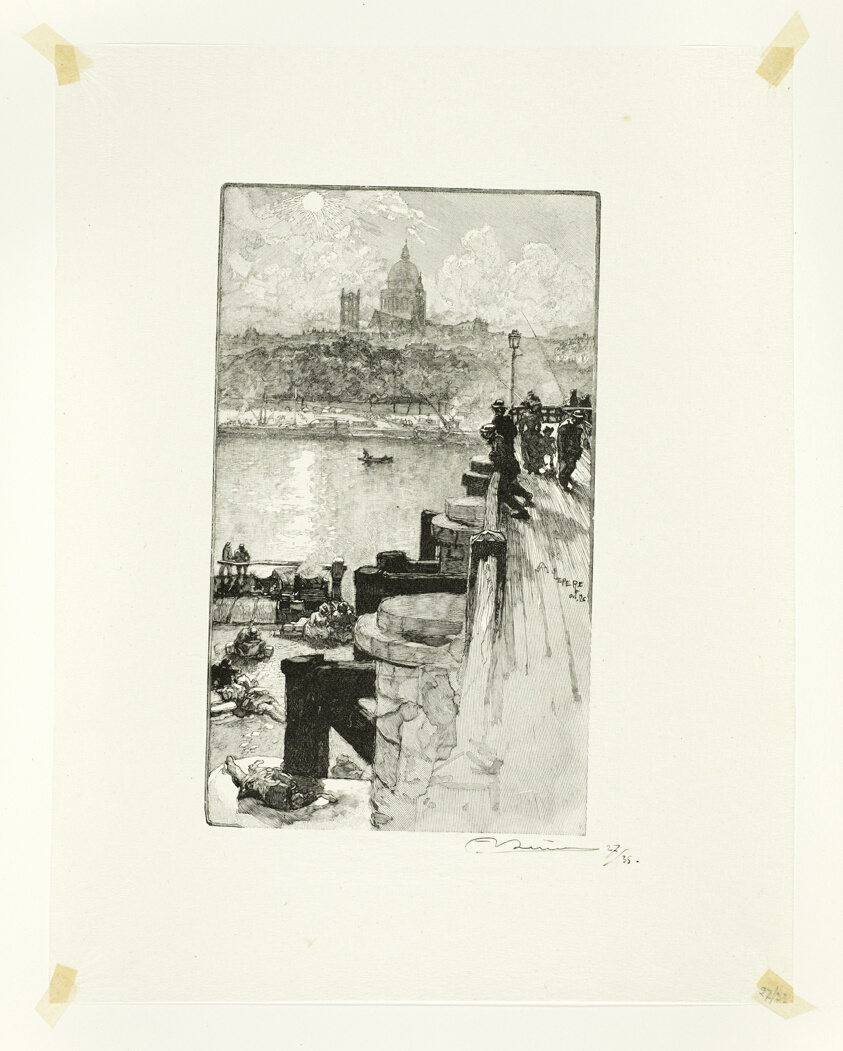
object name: Print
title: La Montagne Sainte-Geneviève, rue de l'Estacade, plate four from Le Long de la Seine et des Boulevards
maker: Louis Auguste Lepère (French, 1849-1918); published by A. Desmoulins (French, active c. 1908-1910)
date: 1890, published 1910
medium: Wood engraving in black on cream Japanese tissue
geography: France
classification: wood engraving; paper; print; prints and drawing